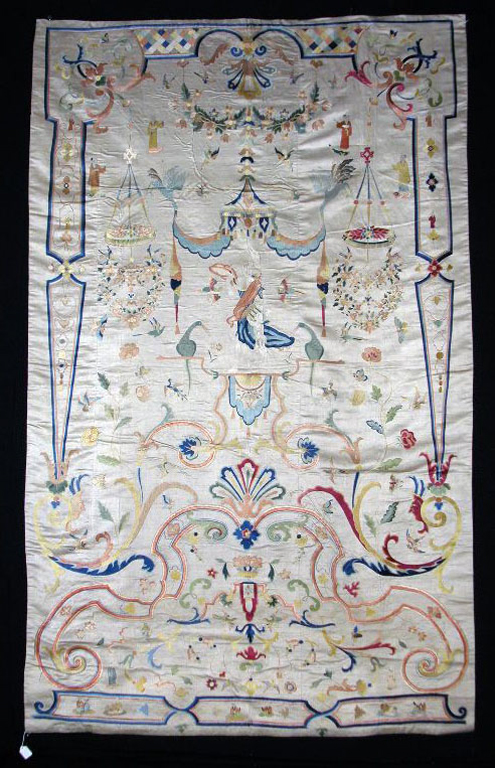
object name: Textile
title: Hanging (Furnishing Fabric)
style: ming, qing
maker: China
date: Ming (1368–1644)/ Qing dynasty (1644–1911), 17th century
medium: Silk, satin weave: embroidered with silk in split, satin, single satin and stem stitches; laidwork and couching; lined with linen, plain weave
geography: China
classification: textile; needlework (visual works); weaving; furnishing textile